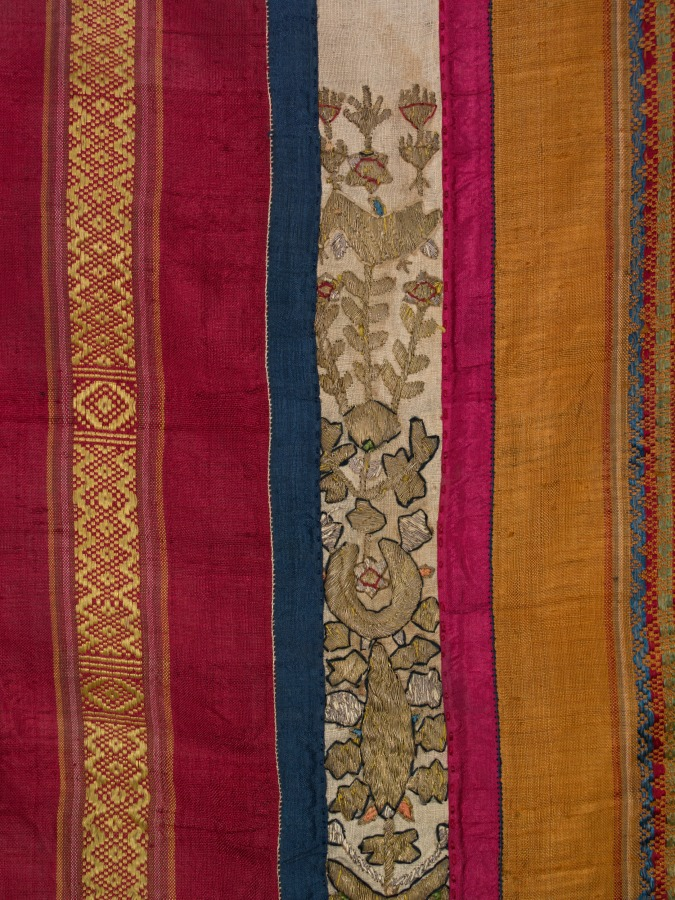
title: Curtain (one of a pair)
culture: Africa, North Africa, Tunisia, Djerba, Tunisian weaver(s) and embroiderer(s)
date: 1600s–1700s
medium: Silk, linen, metal, and dye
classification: Embroidery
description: One of a pair, this curtain displays colorful silk bands with woven geometric motifs, and cream bands with gold-embroidered plants, birds, six-pointed stars, and the khamsah (خمسة), an open five-fingered hand. Birds and the tree of life were popular good luck or fertility symbols linked to marriage. This curtain’s cosmopolitan motifs would have resonated with Jews, Muslims, and Christians alike, reflecting its creation on multiethnic and multireligious Djerba, an island off the Tunisian coast. There, both goldsmithing and gold thread embroidery were done by Jewish artisans (male and female, respectively). The fine materials suggest this curtain once hung in a wealthy home or for special occasions; interior wall hangings were typically made from rough wool.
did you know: When first acquired over a century ago, this curtain had fringe at its lower end.